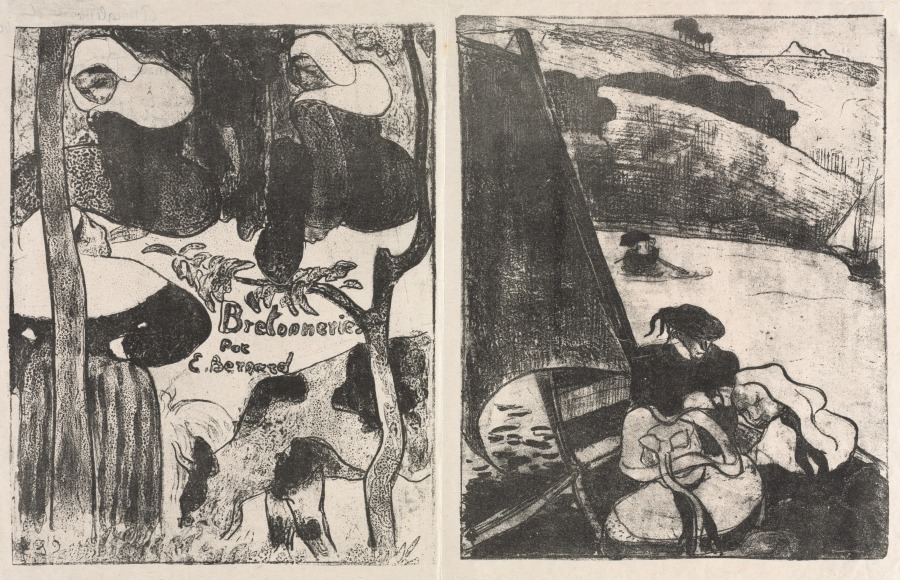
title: Les Bretonneries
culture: France, 19th century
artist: Émile Bernard (French, 1868–1941)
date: 1889, printed 1896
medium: zincograph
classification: Print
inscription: inscribed on verso of title page: A Don Ignatio Zuloago/ Amicalement et/ avec Grattitude artistique/ Emile Bernard/ Seville 1897